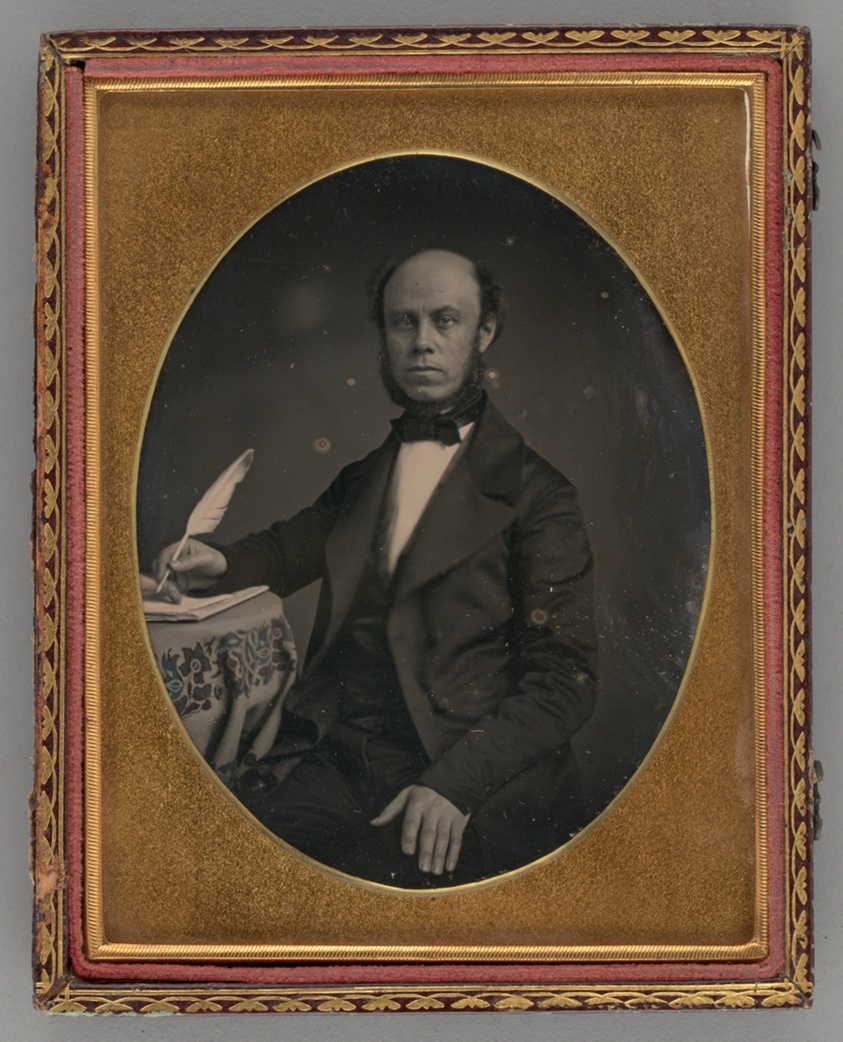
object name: Photograph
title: Untitled (Portrait of Seated Man Holding a Quill)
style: 19th century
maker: Unknown maker; American, 19th century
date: 1853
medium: Daguerreotype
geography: United States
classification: portrait; photograph; photographic process; photography; daguerreotype; portrait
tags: lundberg collection, writing, portraits: male subject, portraits, portrait, photography, Male